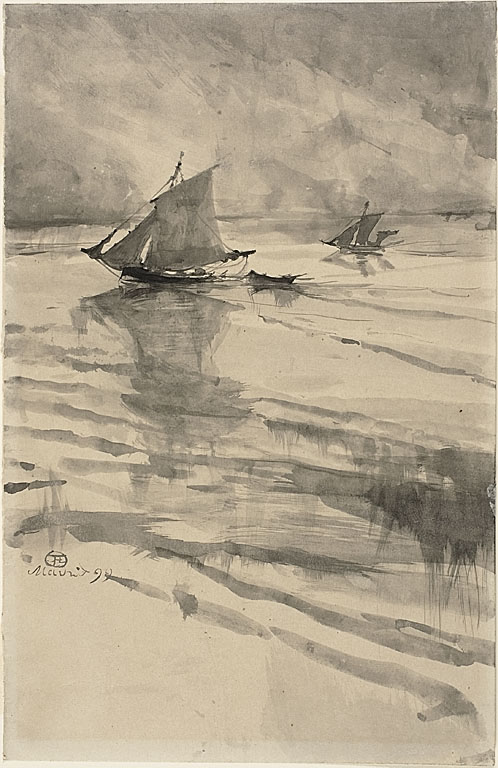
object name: Drawing and Watercolor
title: Sailboats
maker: Henri de Toulouse-Lautrec (French, 1864-1901)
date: 1899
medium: Brush and black ink and gray wash, on ivory wove paper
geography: France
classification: ink or chalk wash; drawings (visual works); prints and drawing